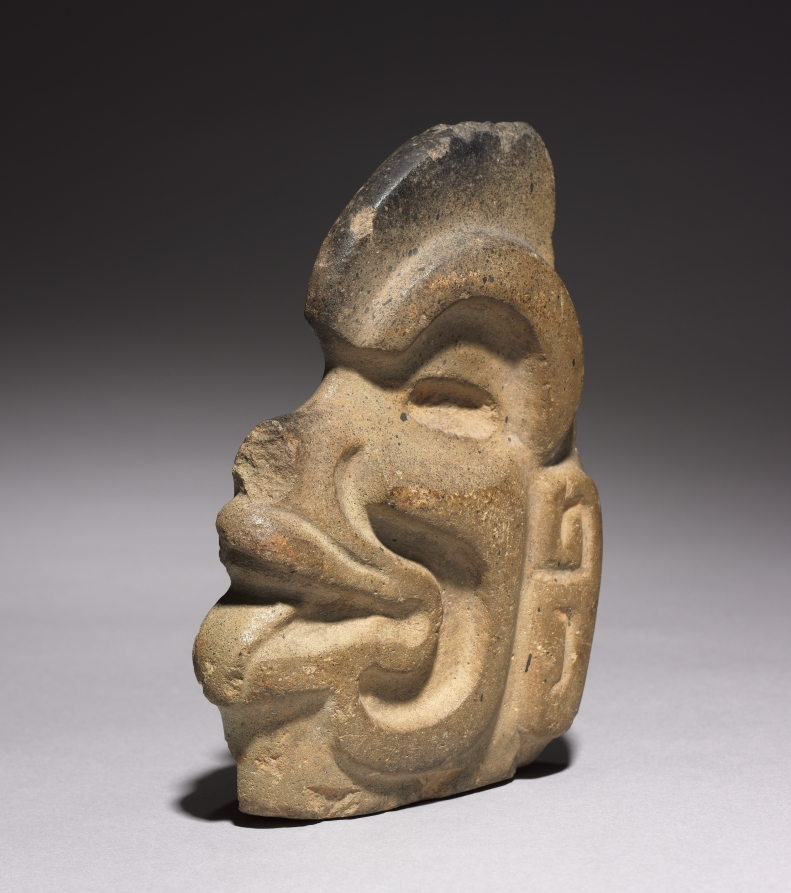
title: Head-Shaped Hacha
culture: Mexico, Isthmus of Tehuantepec(?), Coastal Lowlands style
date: 400–950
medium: stone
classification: Sculpture